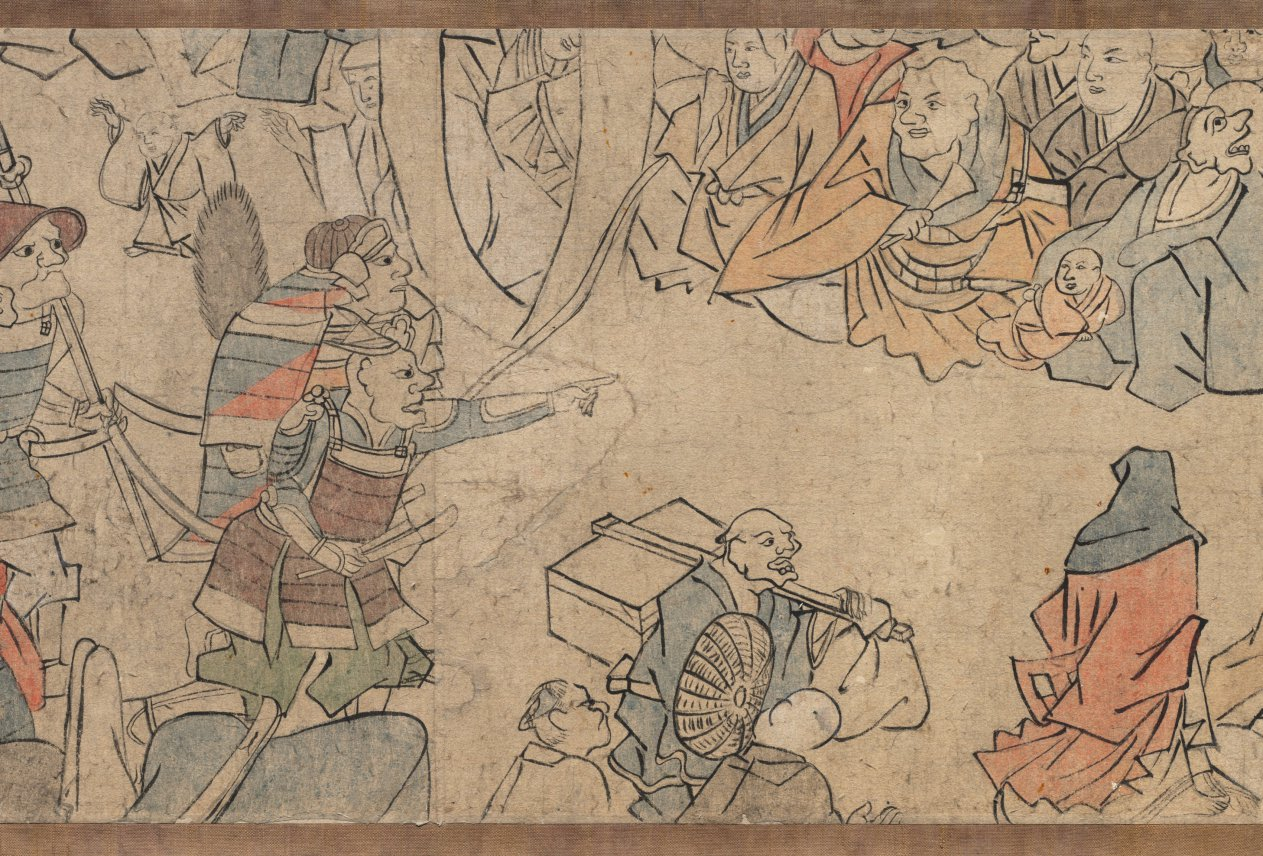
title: Oeyama Engi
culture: Japan, Edo period (1615–1868)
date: 1615–1868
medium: one of a pair of handscrolls; ink and color on paper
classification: Painting